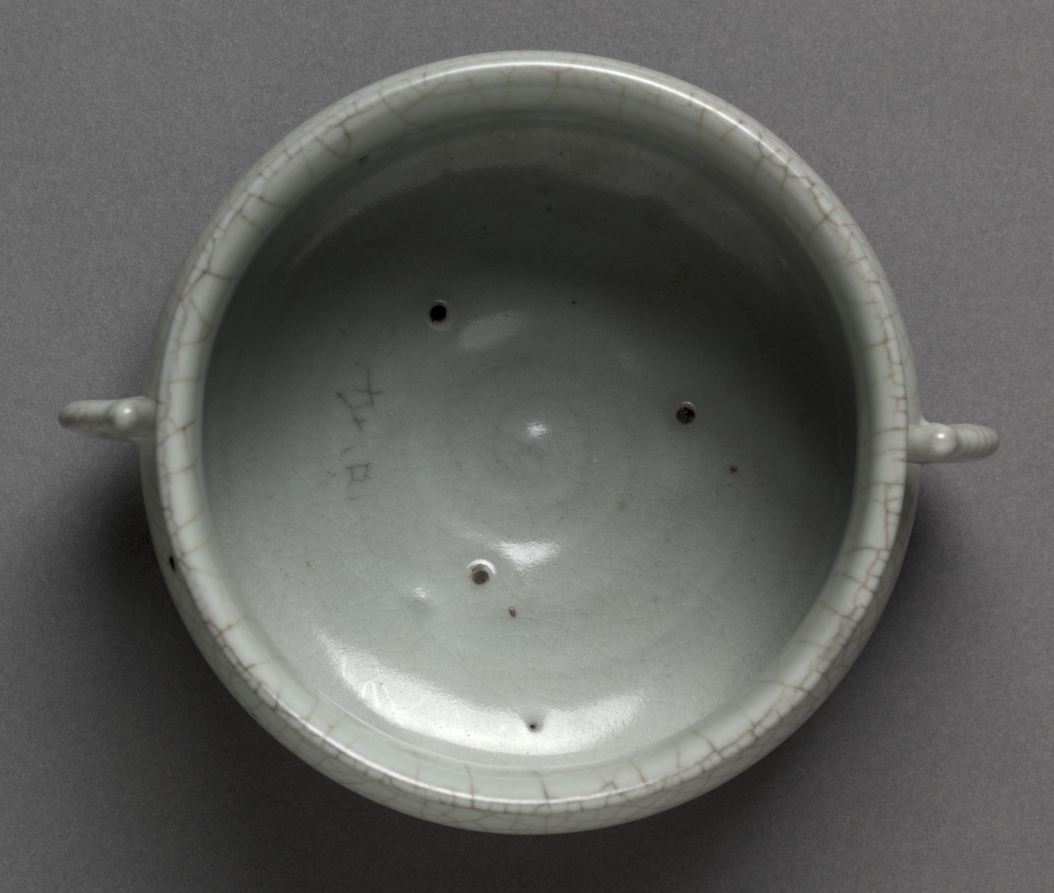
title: Incense Burner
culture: China, Zhejiang province, Hangzhou, Southern Song dynasty (1127-1279)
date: 1200s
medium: porcelaneous stoneware, Guan ware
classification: Ceramic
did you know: There are six spur marks on the incense burner's glazed base.